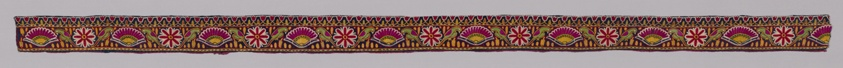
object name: Textile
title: Border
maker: India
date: 19th century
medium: embroidered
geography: India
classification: textile; needlework (visual works)